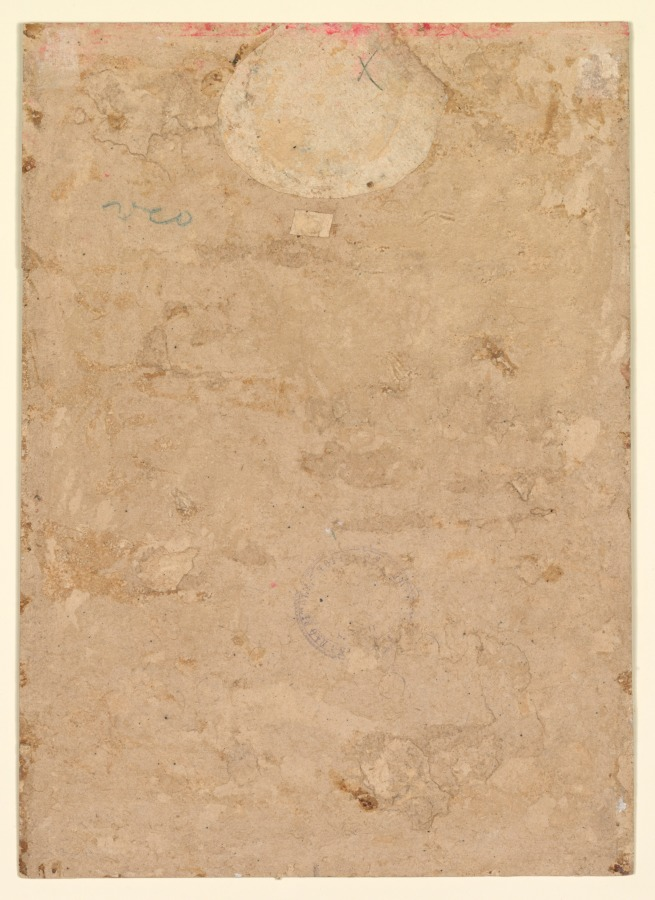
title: Women bathing before an architectural panorama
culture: India, Lucknow, Mughal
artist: Fayzullah (Indian, active c. 1730–1765)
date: c. 1765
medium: Gum tempera and gold on paper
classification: Painting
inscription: Persian inscription in center, on marble balustrade, in nasta‘liq script: The work of Fayzullah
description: Despite the wars waged and forts besieged in the background, life in the palace is carefree and luxurious. Some women enjoy hookahs and music on balconies, while others swim and drink liquor with abandon from Chinese porcelain cups and bottles. The artist has placed his name under the central pavilion, observing the scene across a formal garden of marigolds. The artist seems to have enjoyed experimenting with the idea of perspective, learned from European sources. He created a rapidly receding space that telescopes the view from the intimate harem quarters to the distant battlefields.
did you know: The artist signed his name below the king’s seat that overlooks the garden vista.